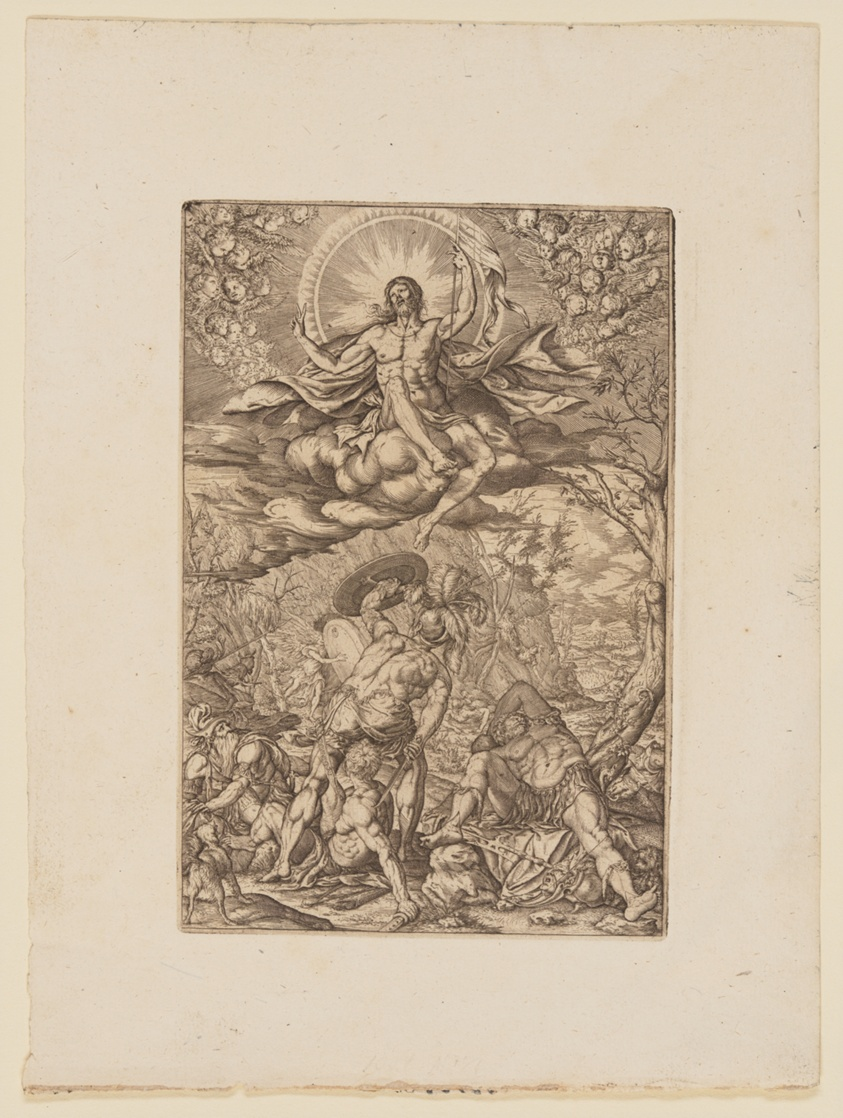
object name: Print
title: The Resurrection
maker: Melchior Meier (German, active c. 1572–1582)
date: 1577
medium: Engravig on ivory laid paper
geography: Germany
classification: engraving; paper; print; prints and drawing